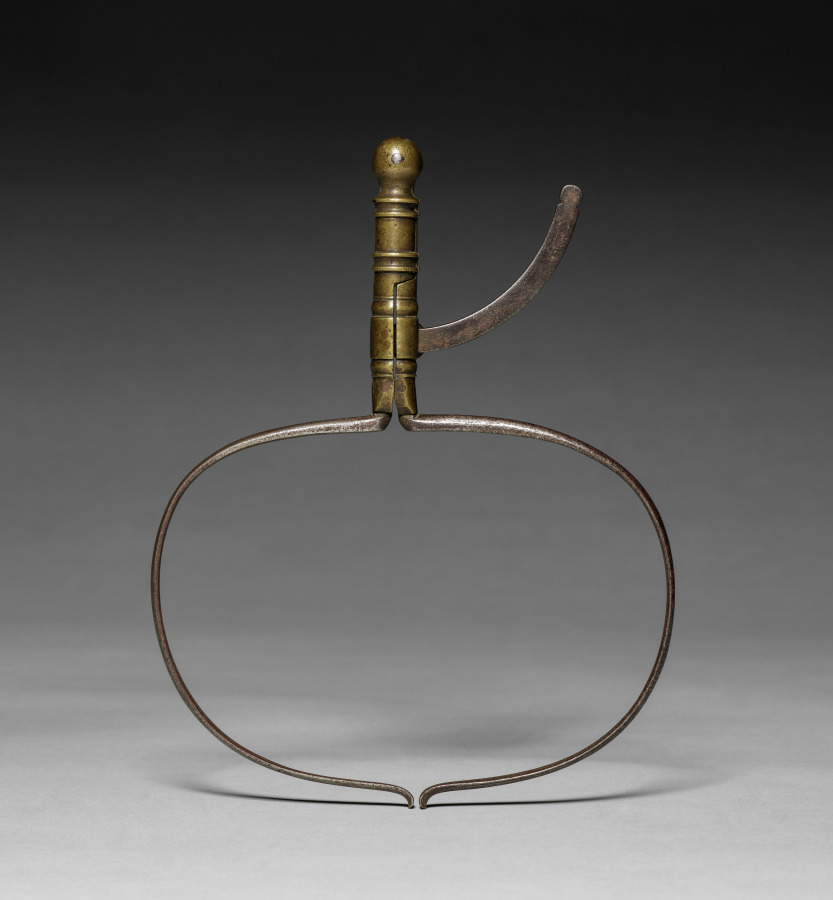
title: Inside Calipers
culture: Europe, 18th century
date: 1700s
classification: Tool